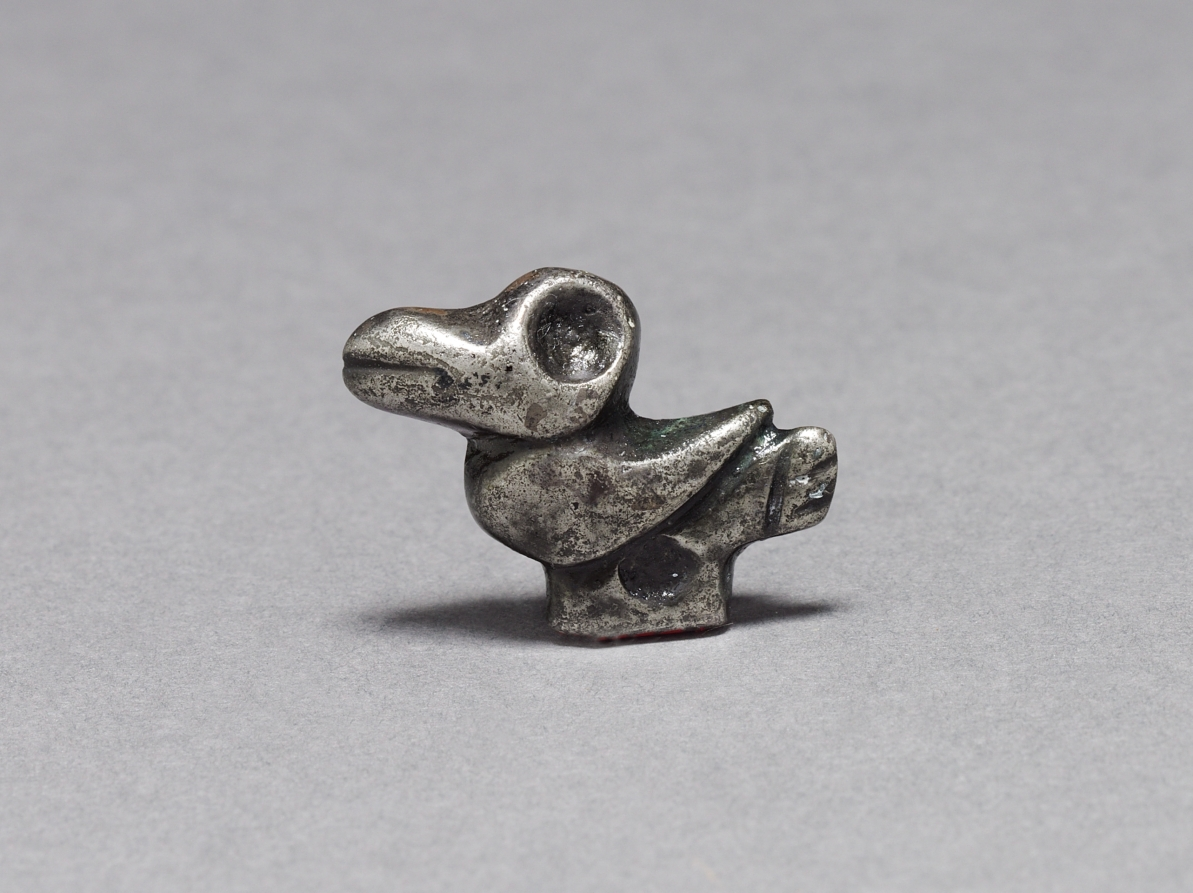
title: Bird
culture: Peru, Chimú (?)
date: 900–1200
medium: silver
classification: Metalwork